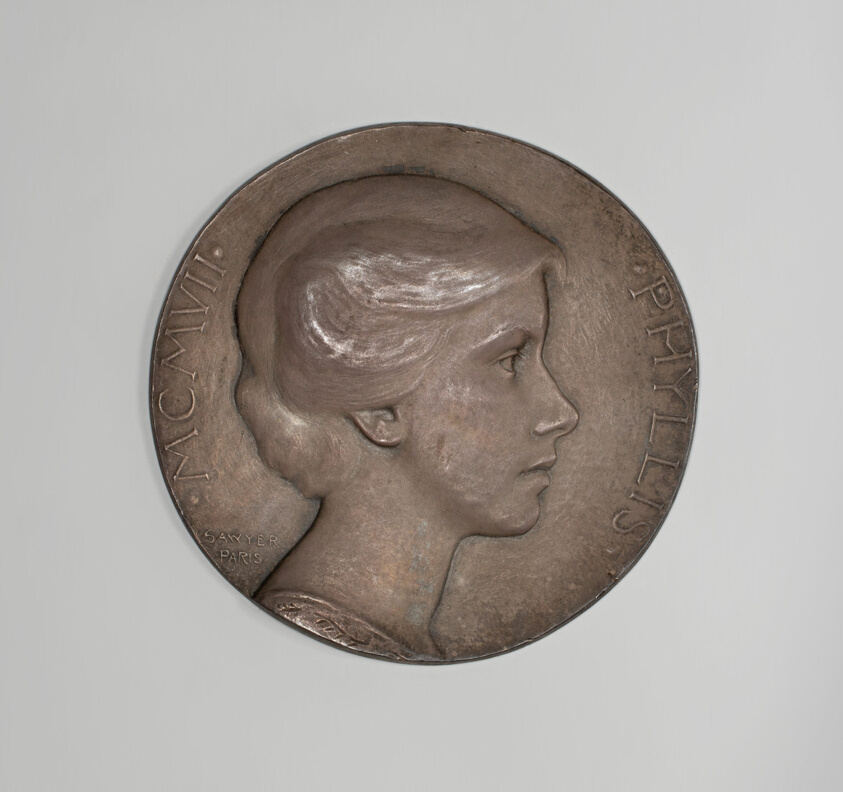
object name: Metalwork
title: Phyllis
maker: Edward Warren Sawyer (American, 1876–1932)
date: 1908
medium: Bronze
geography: United States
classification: medal; american arts; decorative arts